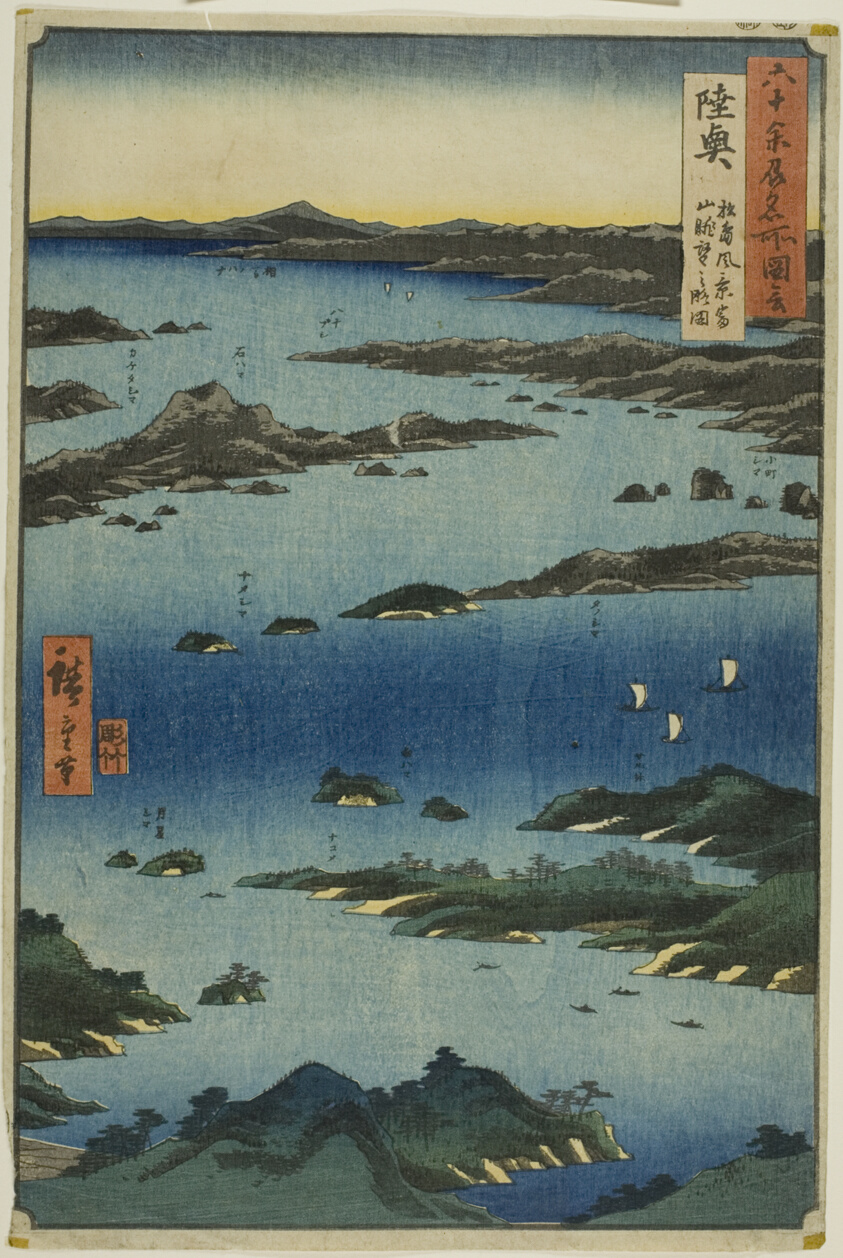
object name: Print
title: Mutsu Province: View of Matsushima with a Distant Prospect of Mount Tomi (Mutsu, Matsushima fukei, Tomiyama chobo no ryakuzu), from the series "Famous Places in the Sixty-odd Provinces (Rokujuyoshu meisho zue)"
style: Japanese (culture or style)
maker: Utagawa Hiroshige 歌川 広重; Japanese, 1797–1858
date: 1853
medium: Color woodblock print; oban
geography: Japan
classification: woodblock print; print